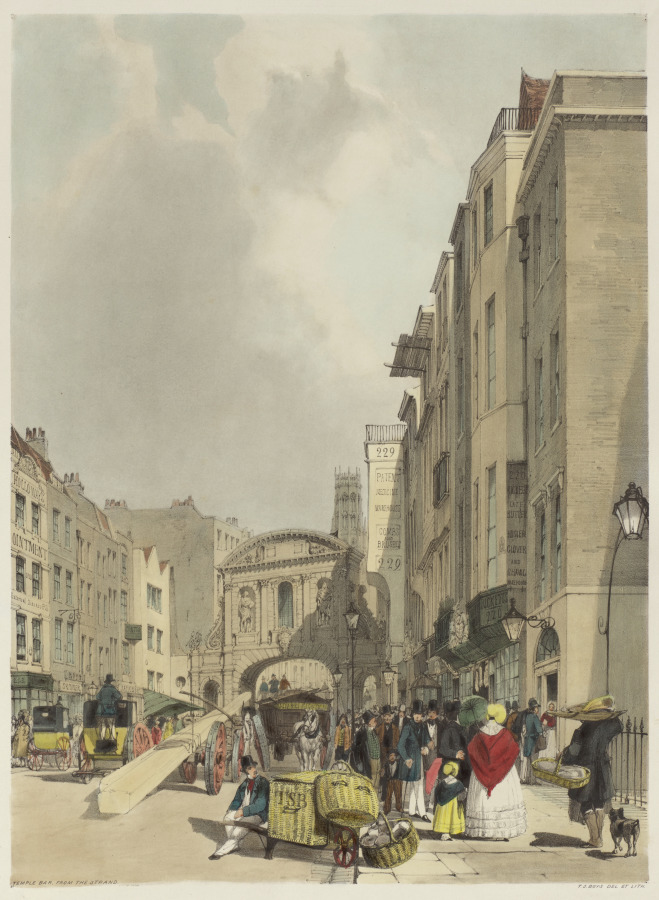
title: London As It Is: Temple Bar, from the Strand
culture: England, 19th century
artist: Thomas Shotter Boys (British, 1803–1874)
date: 1842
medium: lithograph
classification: Bound Volume